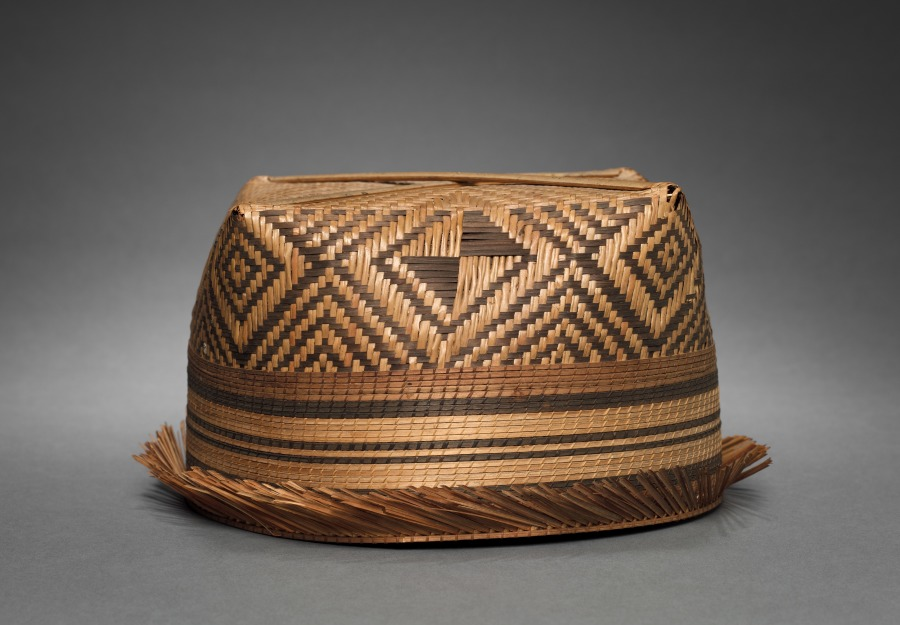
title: Hat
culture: Africa, Central Africa, Democratic Republic of the Congo, Mangbetu-style maker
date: by 1928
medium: Plant fibers and dye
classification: Garment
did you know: This woven hat looks brand new because it was one of the many items the business-savvy chief of Ekibondo had artists and artisans make for the foreigners who passed through his village.